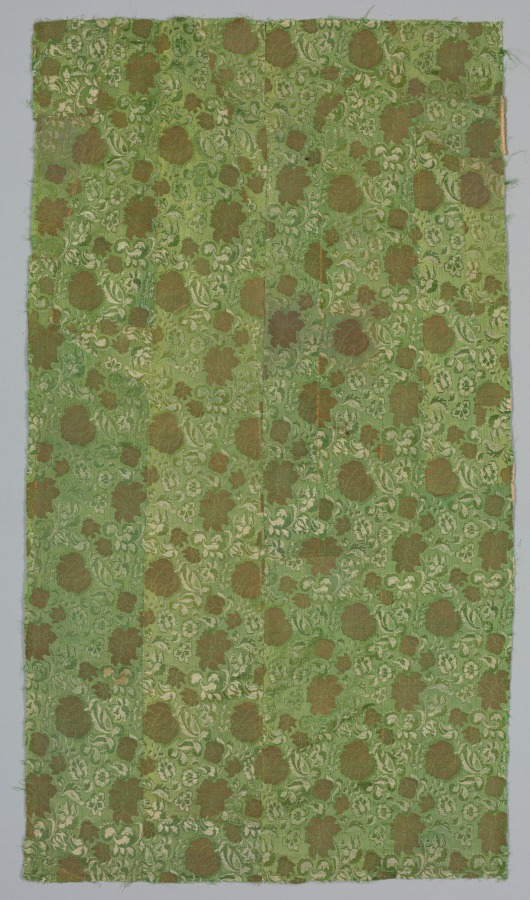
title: Textile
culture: Italy, early 18th Century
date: c. 1700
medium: lampas weave, silk and gold thread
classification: Textile